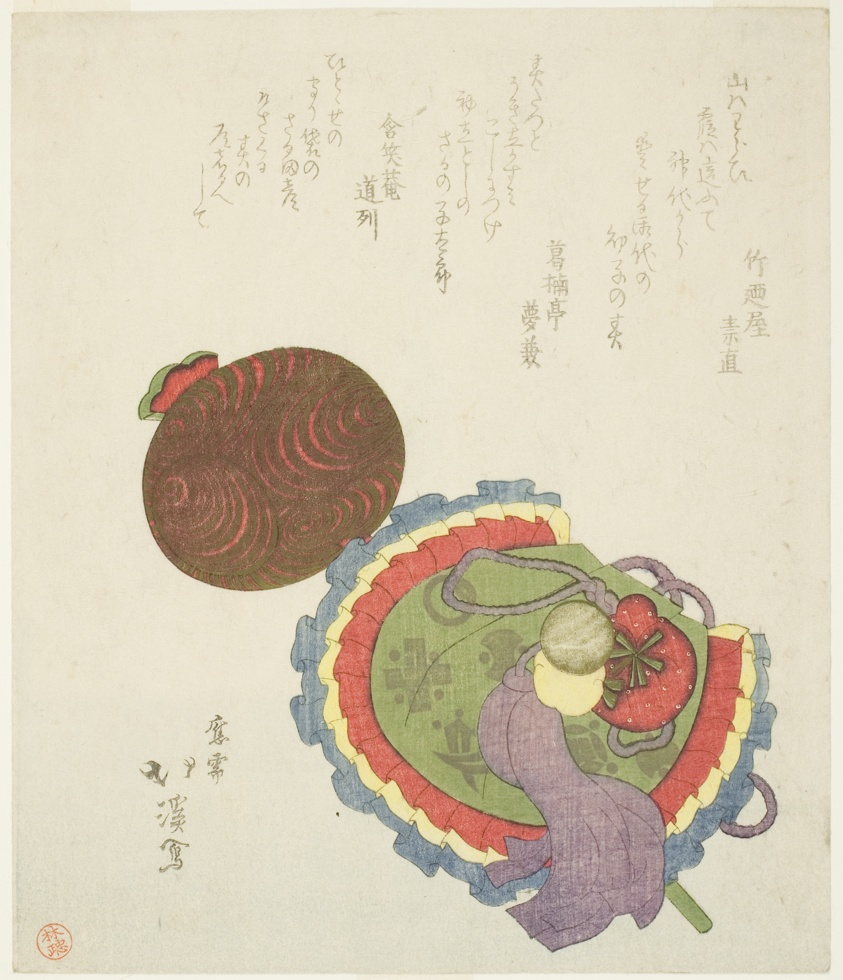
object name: Print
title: Purse and mallet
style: Japanese (culture or style)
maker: Totoya Hokkei (Japanese, 1780–1850)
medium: Color woodblock print; shikishiban, surimono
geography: Japan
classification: woodblock print; print; asian art